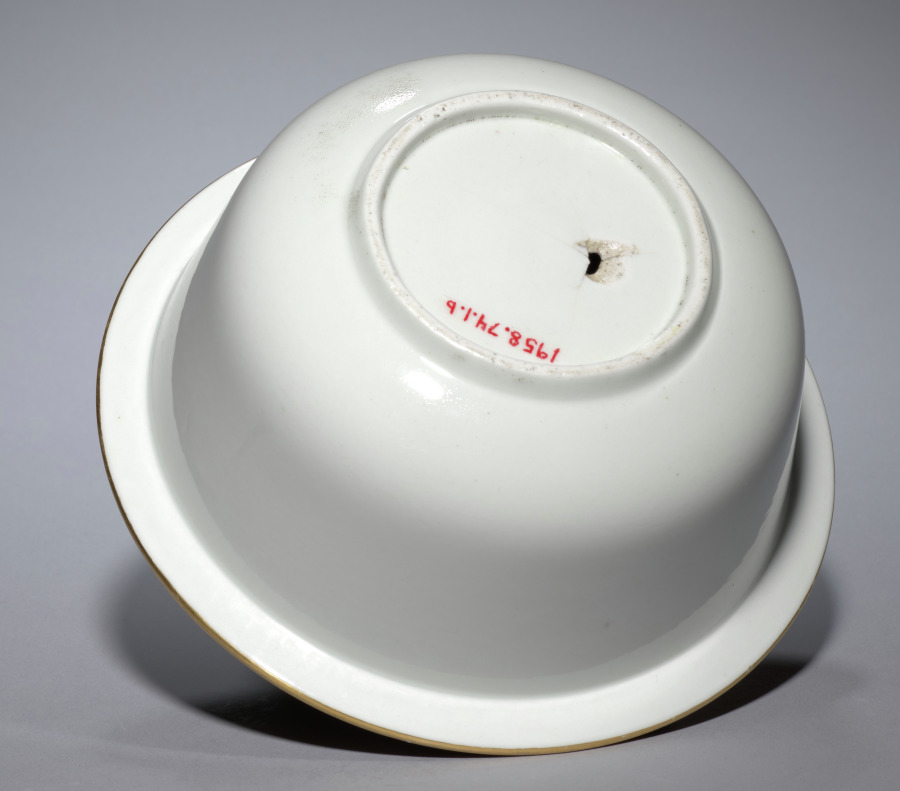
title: Liner for an Ice Pail (1 of 2)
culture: England, late 18th-early 19th Century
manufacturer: Flight & Barr (British)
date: c. 1792–1804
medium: porcelain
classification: Ceramic